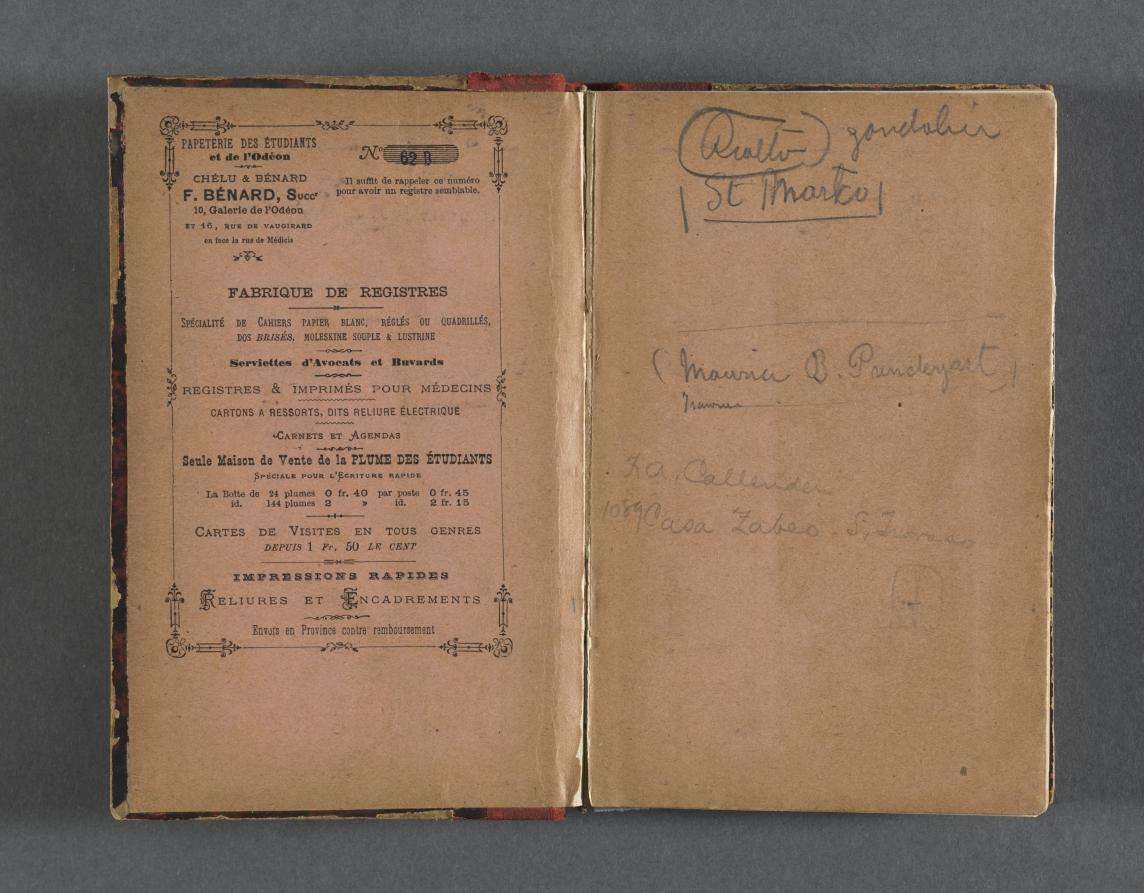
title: Italian Sketchbook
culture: America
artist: Maurice Prendergast (American, born Newfoundland [now Canada], 1858–1924)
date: 1898–1899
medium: pencil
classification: Bound Volume